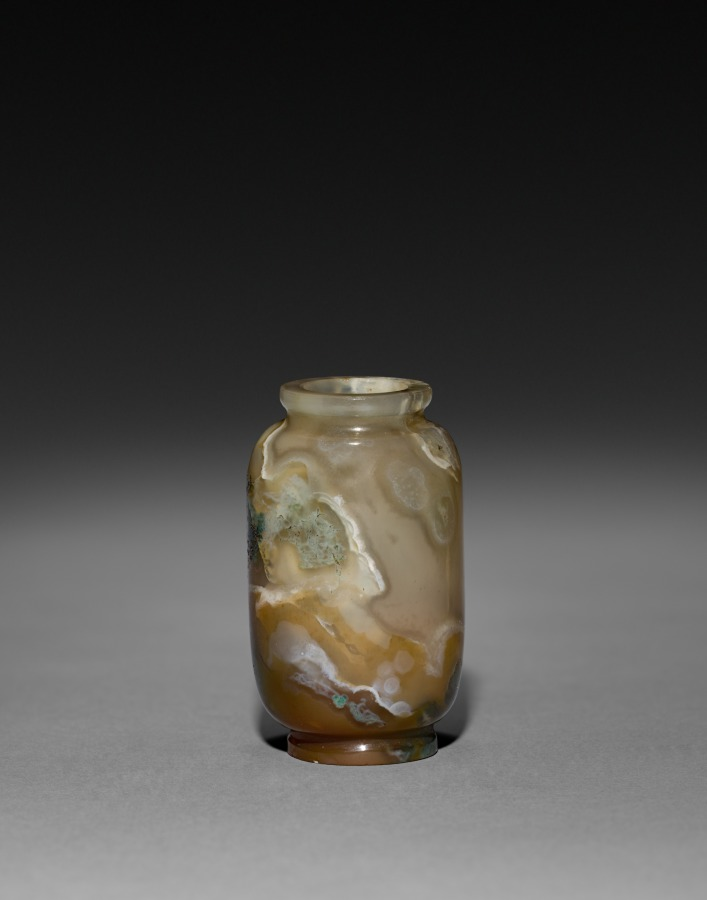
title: Snuff Bottle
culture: China, Qing dynasty (1644-1911)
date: 1644–1911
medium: glass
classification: Glass